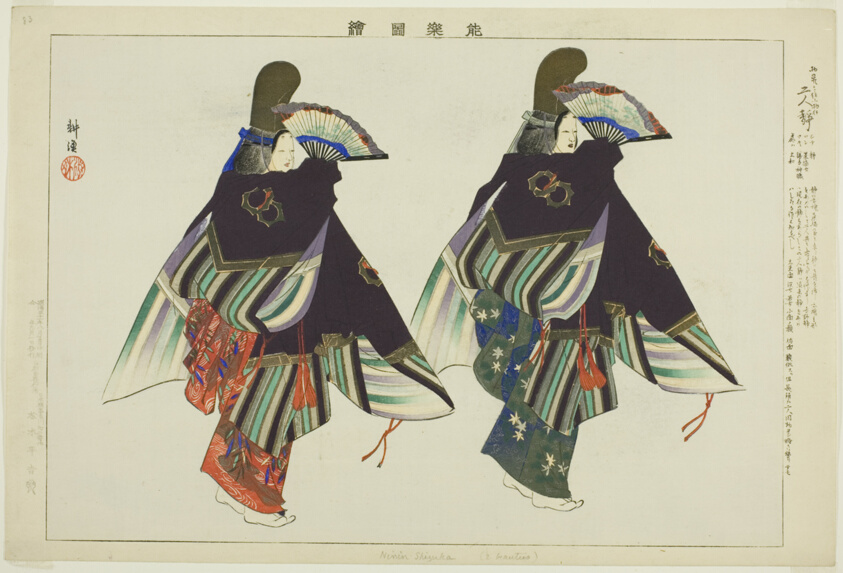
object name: Print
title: Futari Shizuka, from the series "Pictures of No Performances (Nogaku Zue)"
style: Japanese (culture or style)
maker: Tsukioka Kogyo; Japanese, 1869-1927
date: 1898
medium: Color woodblock print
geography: Japan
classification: woodblock print; print; asian art